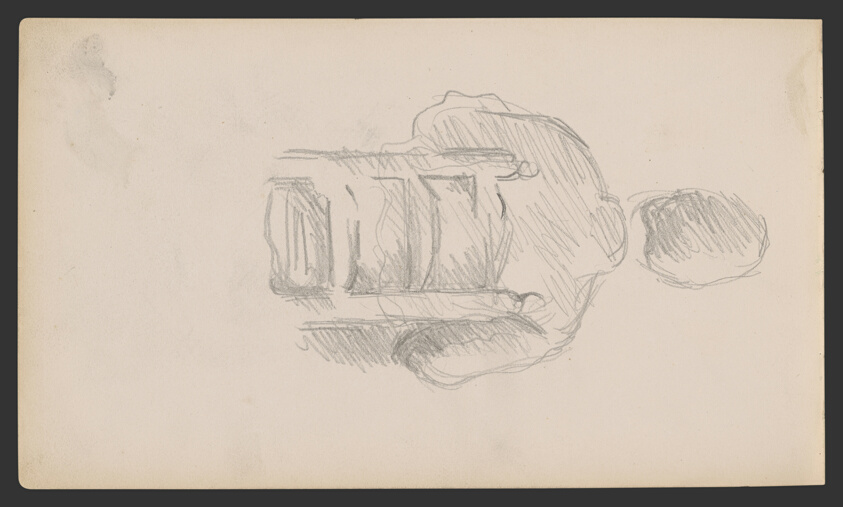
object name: Drawing and Watercolor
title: Sketchbook No. 2 (L'Estaque)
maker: Paul Cézanne; French, 1839-1906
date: 1875–86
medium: Graphite and pen and ink drawings on paper, bound into a book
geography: France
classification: sketchbook; graphite; prints and drawing; paper